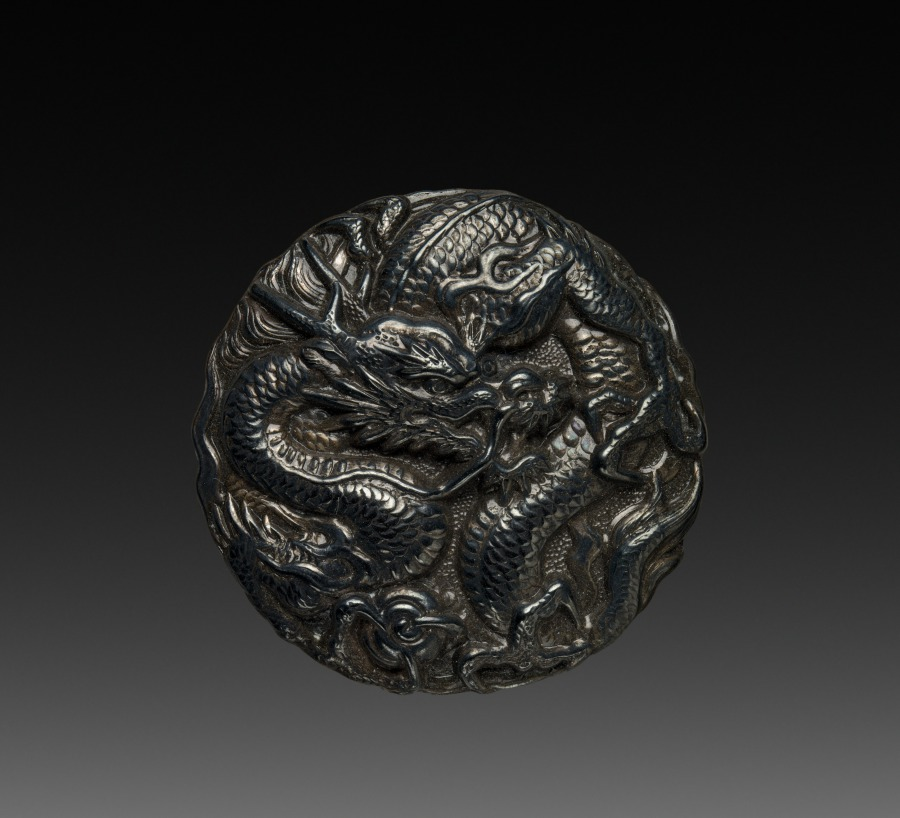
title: Button with Dragon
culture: Japan, Meiji period (1868–1912) to Taishō period (1912–26)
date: early 1900s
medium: One of a set of six buttons; cast (?) silver with relief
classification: Metalwork